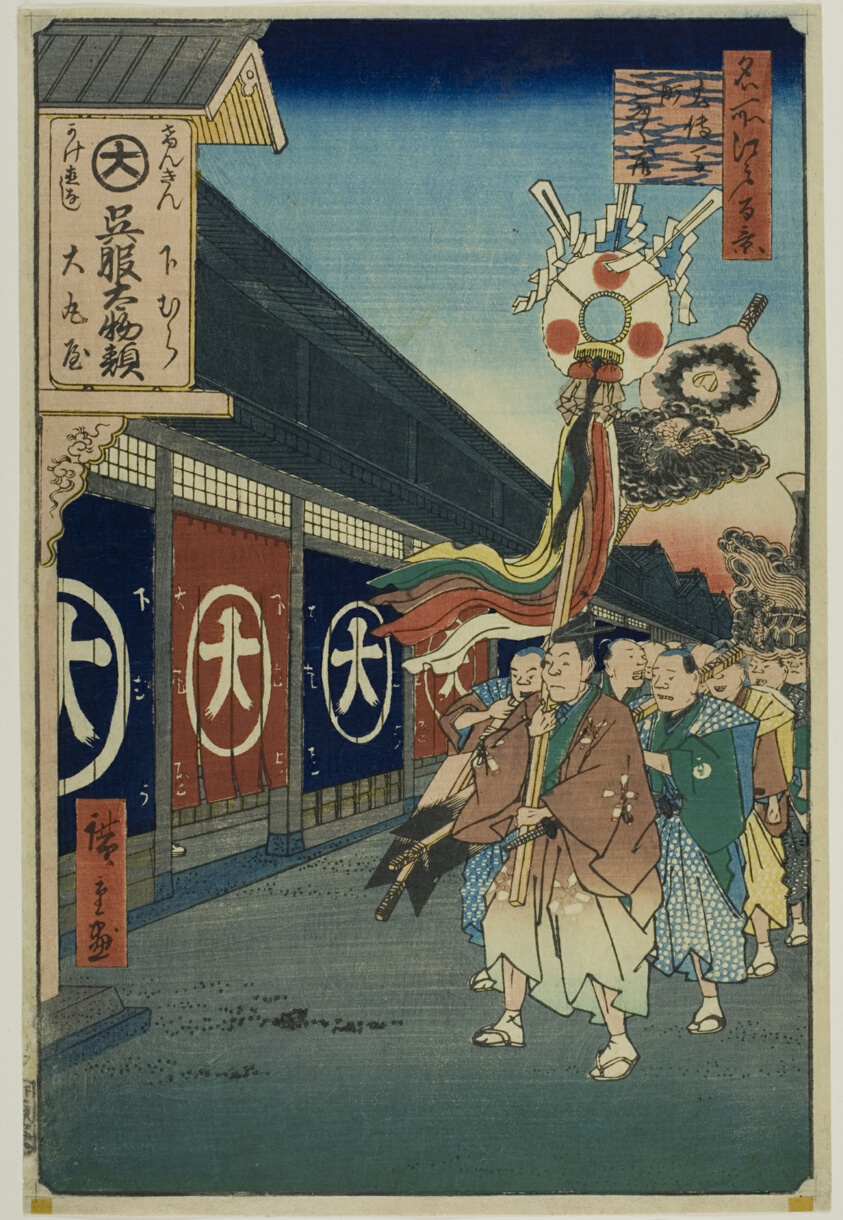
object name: Print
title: Silk-goods Lane, Odenma-cho (Odenma-cho gofukudana), from the series "One Hundred Famous Views of Edo (Meisho Edo hyakkei)"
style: Japanese (culture or style)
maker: Utagawa Hiroshige 歌川 広重; Japanese, 1797–1858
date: 1858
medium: Color woodblock print; oban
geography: Japan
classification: woodblock print; print